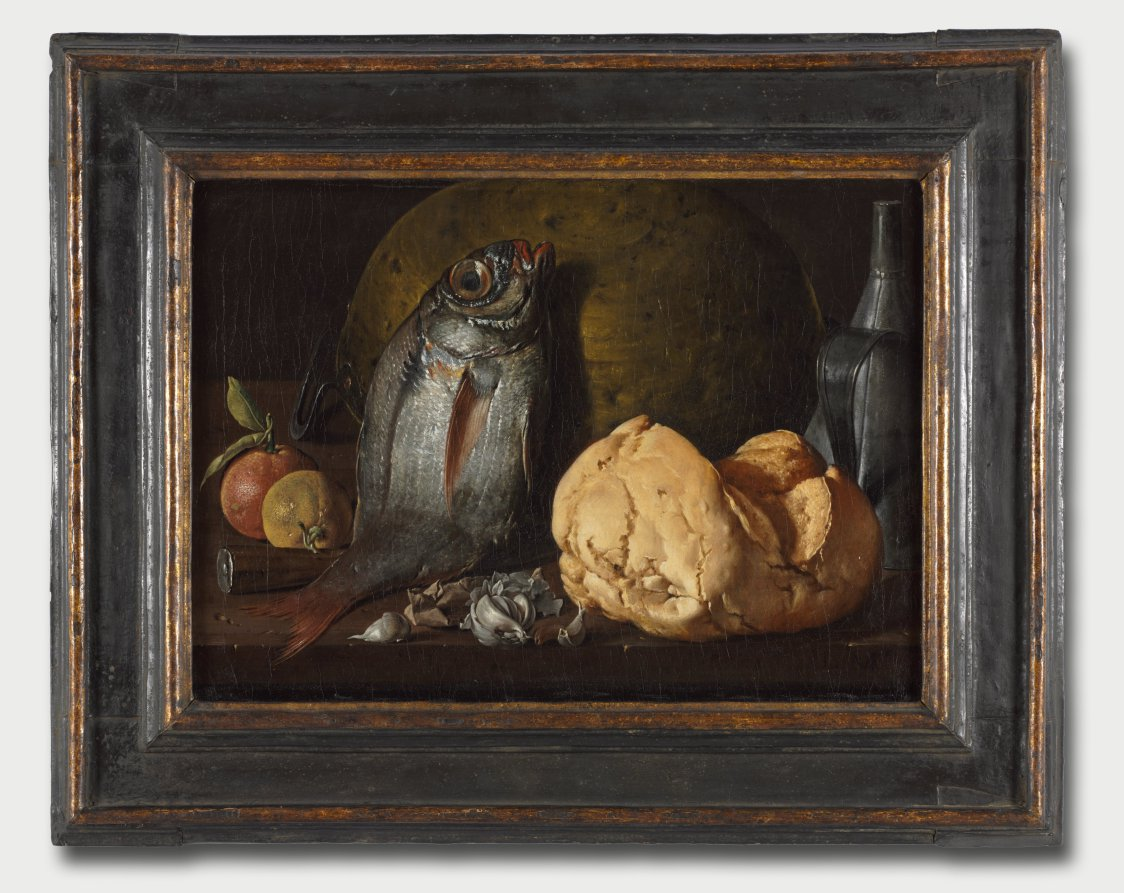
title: Still Life with Fish, Bread, and Kettle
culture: Spain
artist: Luis Meléndez (Spanish, 1716–1780)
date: c. 1772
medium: oil on canvas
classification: Painting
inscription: Signed lower right: "L.M.[z]"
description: During the 1760s, after painting portraits and portrait miniatures with his father, Meléndez began to specialize in still lifes. Active mainly in Madrid, he is regarded as the finest Spanish still-life painter of the 18th century, but he spent much of his life in poverty.